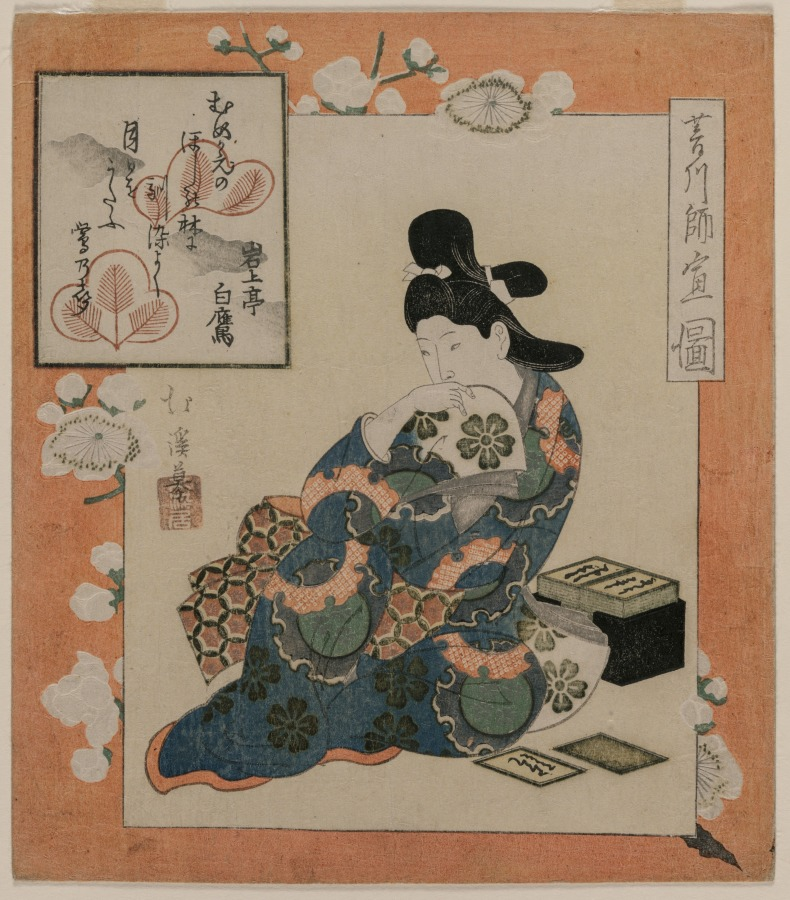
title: A Picture by Hishikawa Moronobu: Woman with a Set of Poem Cards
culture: Japan, Edo period (1615–1868)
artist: Totoya Hokkei (Japanese, 1780–1850)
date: mid 1820s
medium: color woodblock print (surimono) with gold, silver, and embossing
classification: Print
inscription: Signature: Hokkei mo. Artist Seal: Fusenkyo.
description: The poem by Ganjotei Shirataka reads: Friendly, amid the starry forest of the plum branches the voice of the warbler singing of the sun and moon.